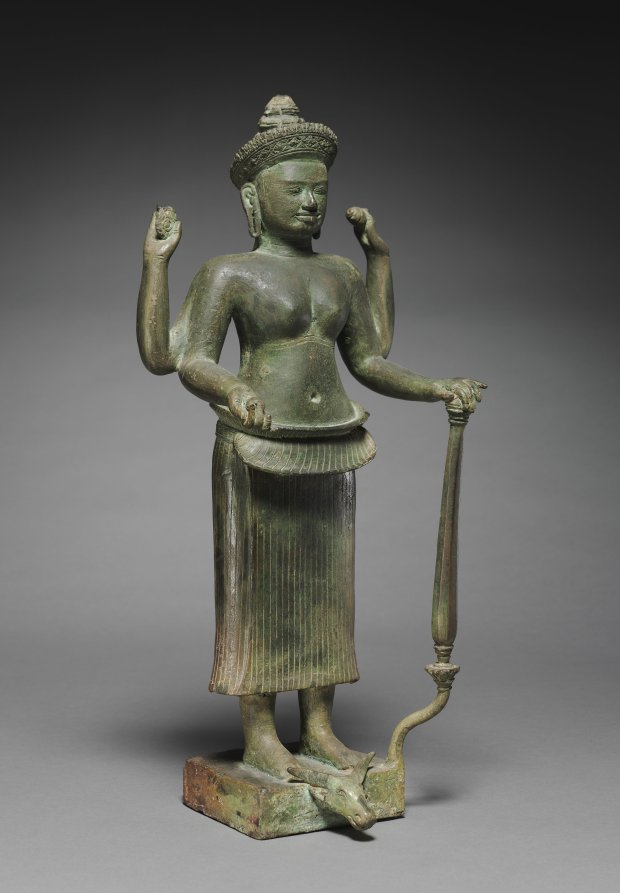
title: Durga as the Slayer of the Buffalo Demon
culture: Cambodia, probably Koh Ker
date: 900s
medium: bronze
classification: Sculpture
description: This depiction of Durga is rare and important, as it is a large-scale example of the goddess in bronze. Her conquest over the buffalo demon is indicated by its severed head at her feet. She stands four-armed and triumphant, with a wheel, conch shell, mace, and clod of earth in her hands.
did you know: The figure wears a head-dress, kirita-makuta, a diadem tied in the back and pointed at top.